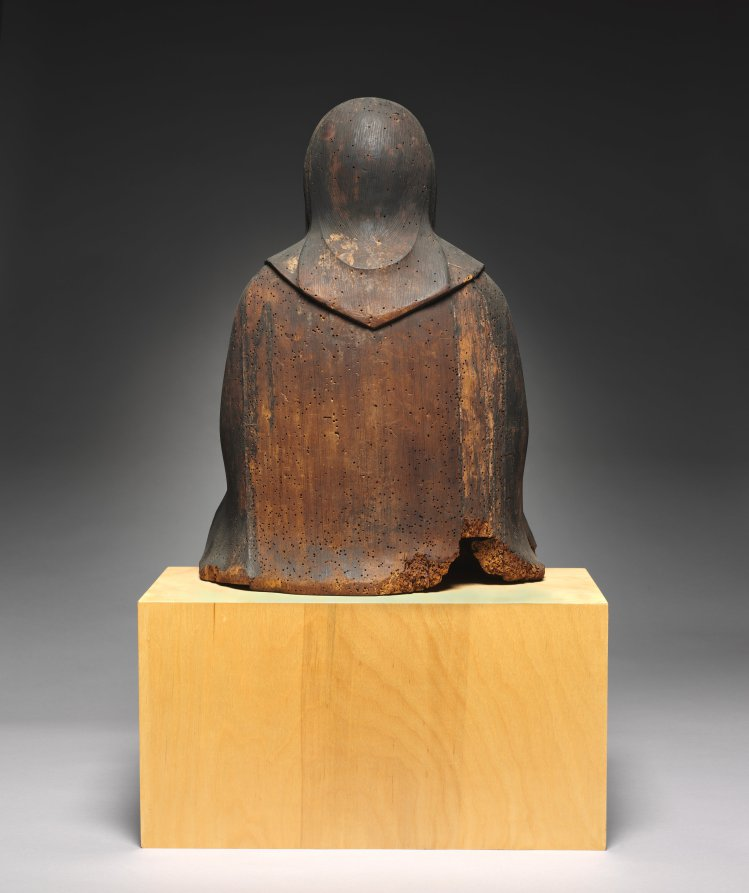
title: En no Gyōja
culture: Japan, Kamakura period (1185–1333)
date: 1200s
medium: wood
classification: Sculpture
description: This Buddhist monk is known as En no Gyōja, or “En the Ascetic” (legendarily 634–701), who is said to have founded Shugendō, a style of religious practice focused on performing challenging, rigorous tests of courage and devotion in mountainous settings.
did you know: This sculpture was once flanked by the demons Zenki and Koki (CMA 2012.40).